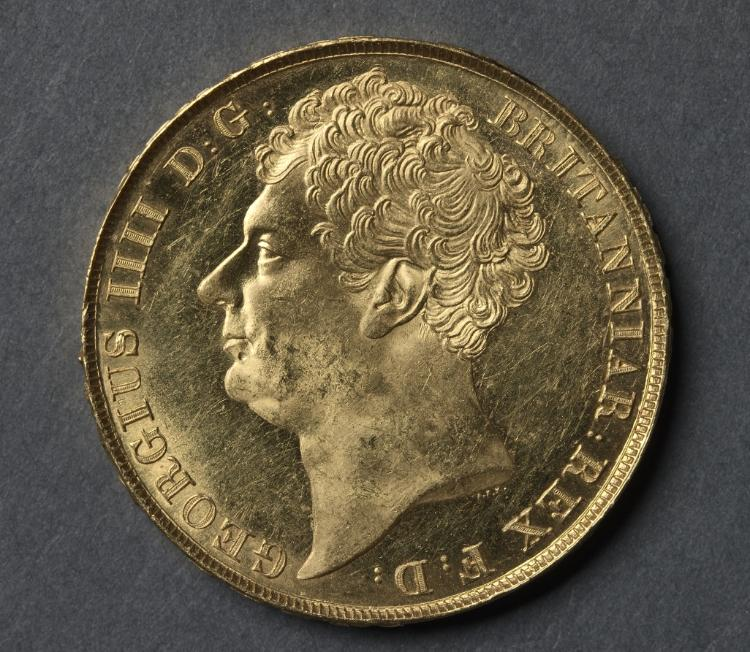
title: Two Pound Piece: Portrait of George IV (obverse)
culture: England, George IV, 1820-1830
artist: after a design by Francis Legatt Chantrey (British, 1781–1841)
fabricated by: Jean Baptiste Merlen (French, 1769–1850)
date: 1823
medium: gold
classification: Coins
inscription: BRITANNIAR: REX F: D: GEORGIUS IIII D: G: